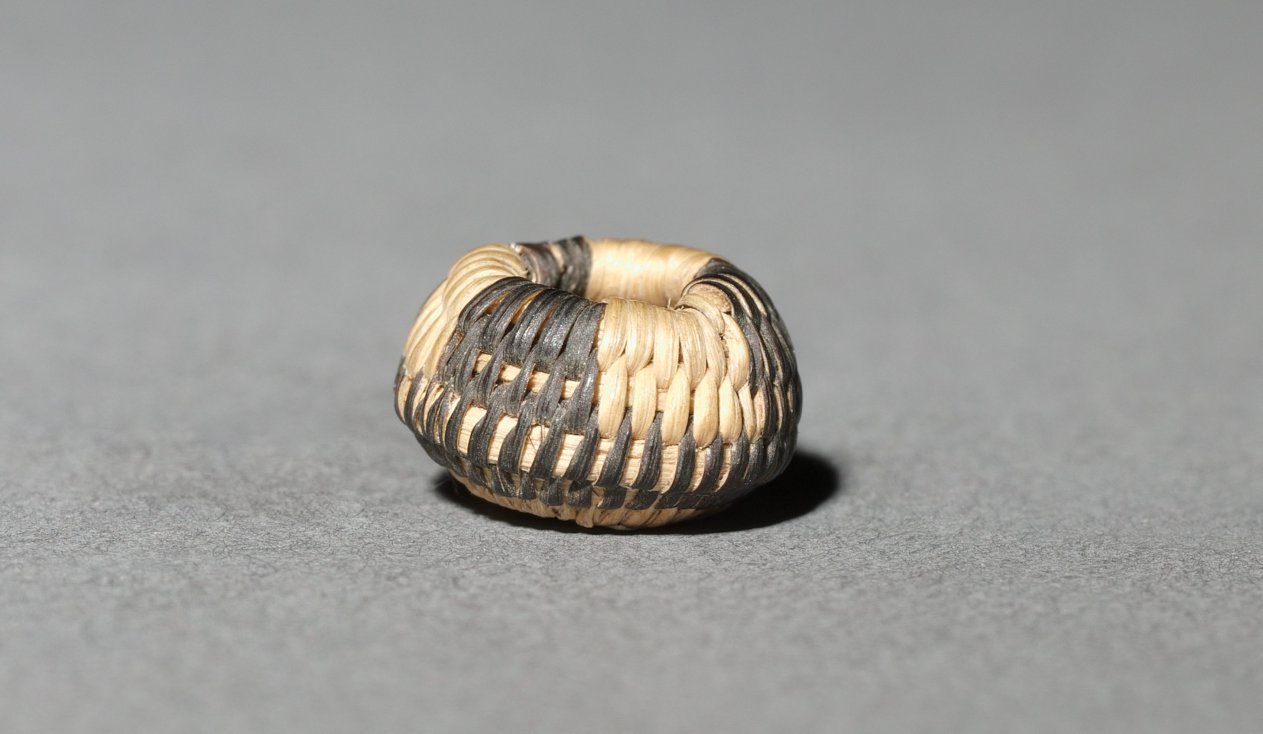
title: Miniature Basket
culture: America, Native North American, Southwest, Arizona, Akimel O'odham (Pima), Unassigned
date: before 1923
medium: plant fiber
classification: Basketry